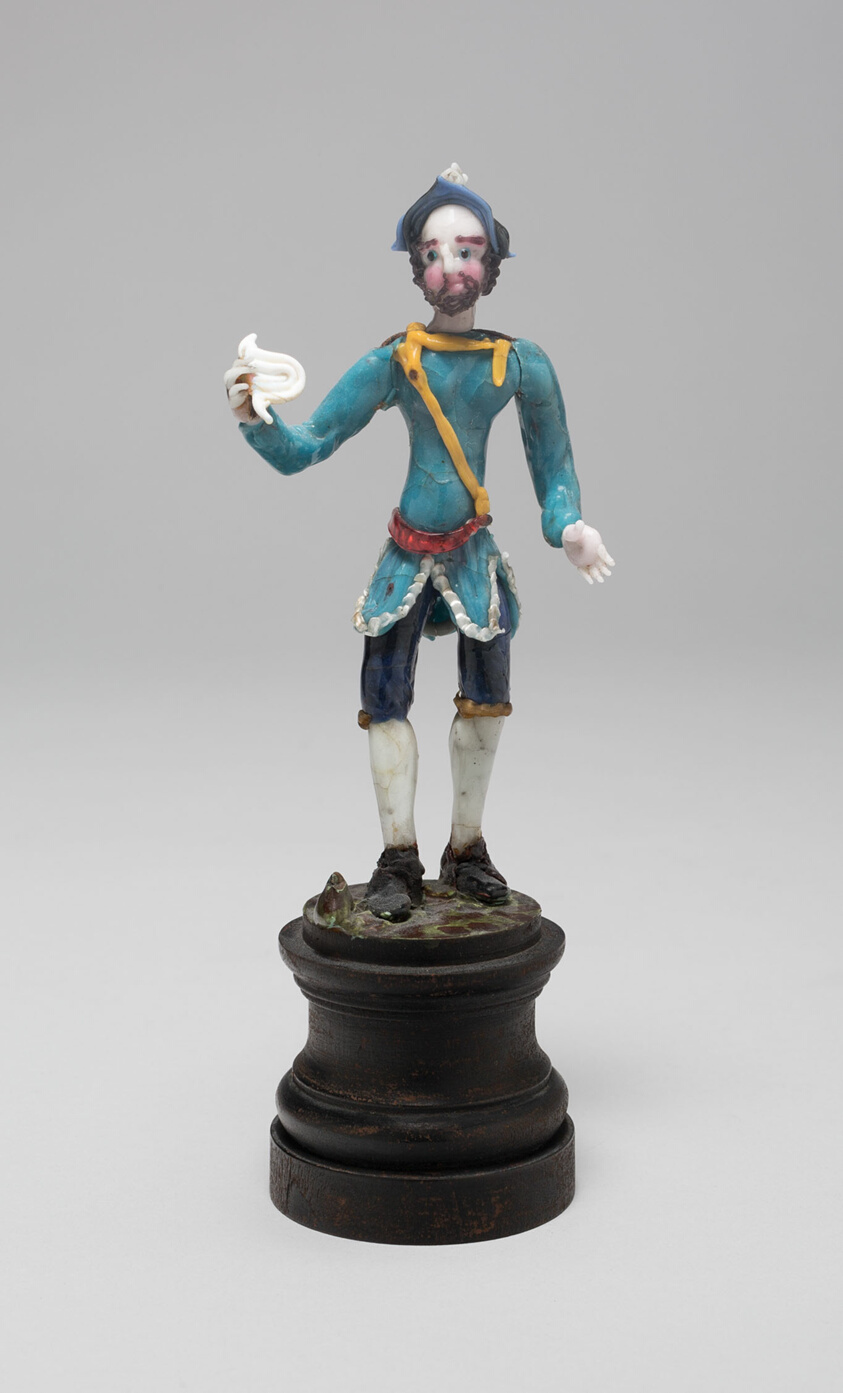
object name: Glass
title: Actor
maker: Nevers, France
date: Late 17th to early 18th century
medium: Glass; lampwork (verre de Nevers), metal armature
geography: France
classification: decorative object/ornament; lampwork; glass; european decorative arts